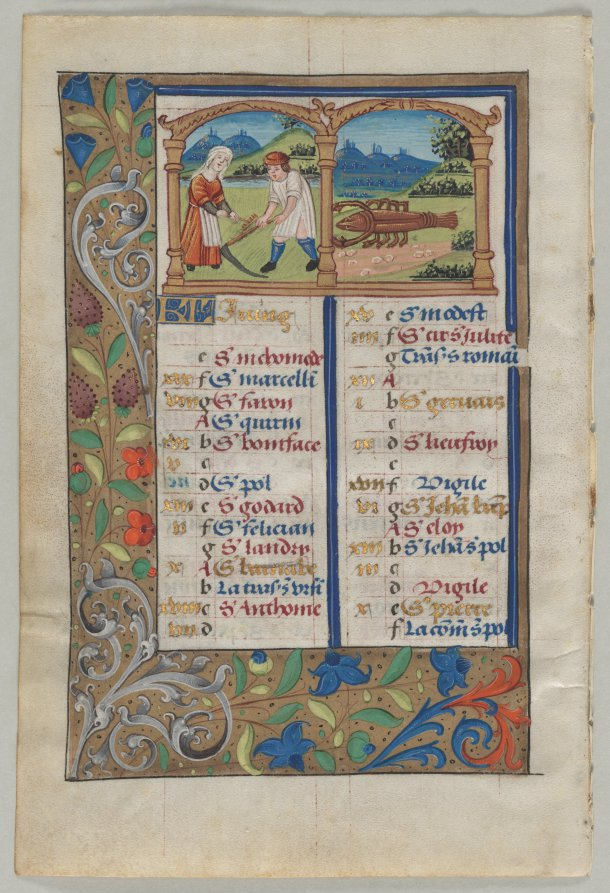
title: Leaf from a Book of Hours: Calendar Page for June (verso)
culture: France, Rouen, 16th century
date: c. 1510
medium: ink, tempera and liquid gold on vellum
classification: Manuscript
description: On this calendar page, June is illustrated with the month’s labor of gathering hay. One figure cuts hay with a scythe while the other uses a rake to gather it. Also featured is a crab, signifying the month’s zodiac sign, Cancer. In this lavishly decorated leaf, the most important feast days are listed in gold, while other days are in alternating red and blue inks. The original manuscript containing this leaf was whole as late as the 1980s, and today its leaves can be found in museums around the country.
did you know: It is believed that medieval men and women read their books of hours aloud, not silently.